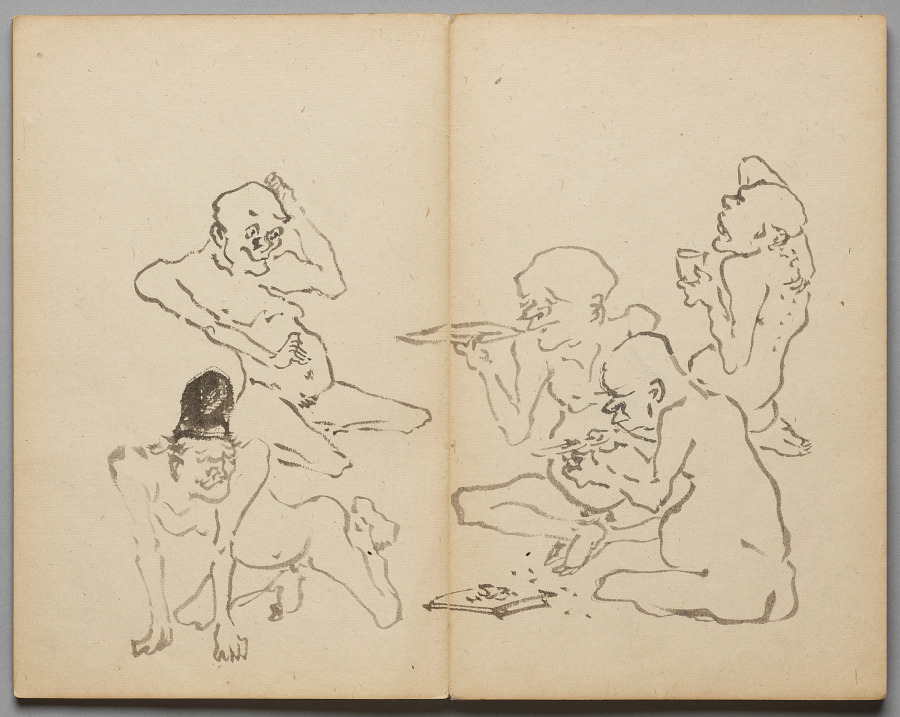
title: Drinking Party from Sketch Album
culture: Japan, Edo period (1615–1868) to Meiji period (1868–1912)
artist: Kawanabe Kyōsai (Japanese, 1831–1889)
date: mid- to late 1800s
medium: Accordion-style book of 26 double-leaves; ink and color on paper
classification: Bound Volume